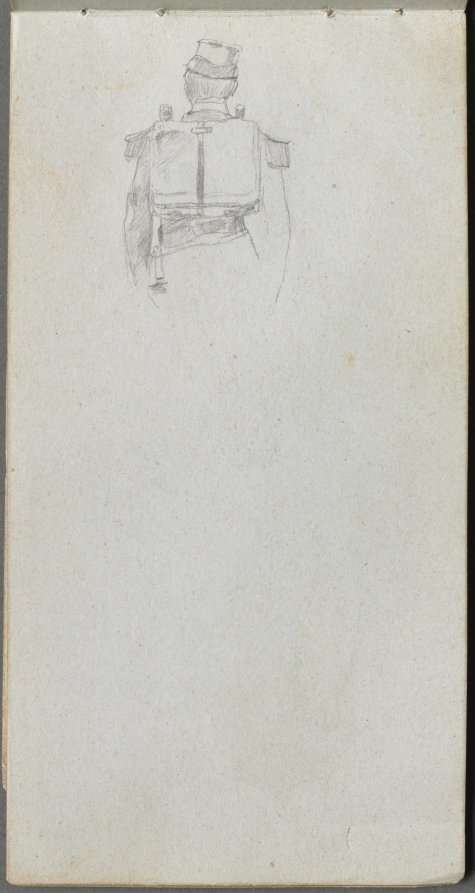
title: Sketchbook, page 8: Study of a Soldier from Behind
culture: France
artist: Ernest Meissonier (French, 1815–1891)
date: c. 1860s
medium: graphite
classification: Bound Volume